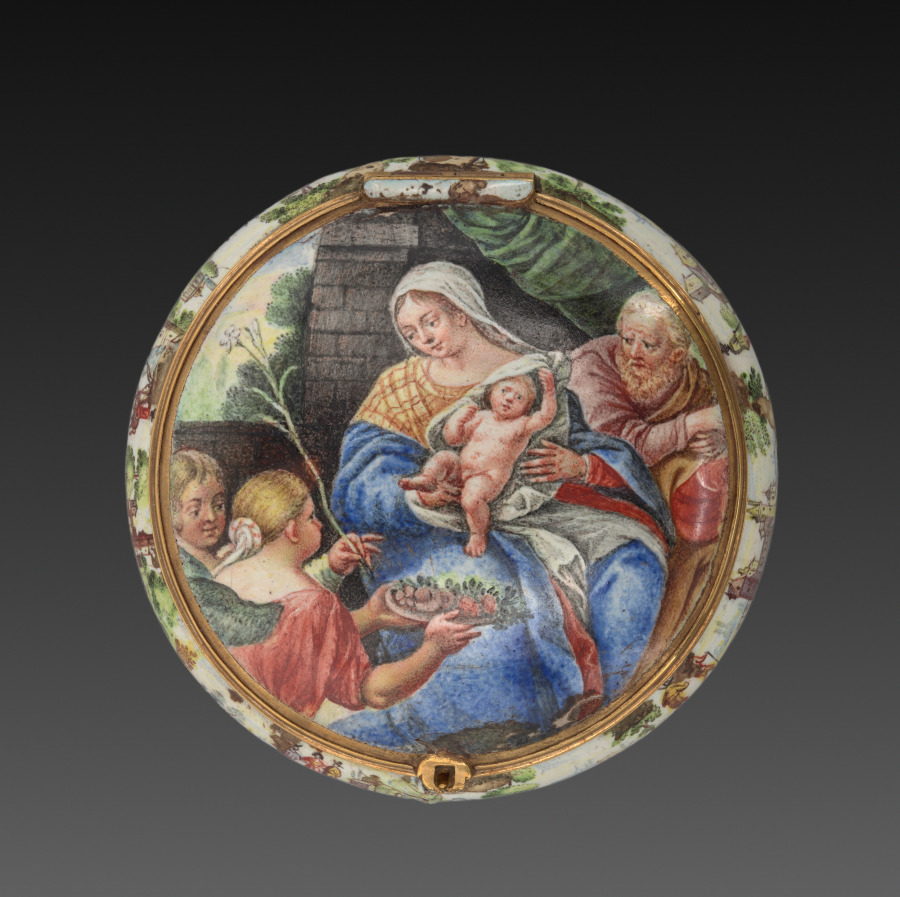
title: Watchcase (Boîtier de montre)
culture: France, 17th century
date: c. 1640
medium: gold and enamel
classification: Jewelry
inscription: [engraved on the rim]: "B8"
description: In the 1630s, the practice of painting with enamel on metal became a means for French miniature painters to achieve a more richly colored, durable product. Previously miniatures were painted with watercolor on vellum, a material made from animal skin. This case would have originally held a watch, but was later transformed into a simple box through the removal of the watch mechanism and ring. This watch case is richly painted inside and out with miniatures modeled after well-known religiously allegorical works.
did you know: Inspiration for the box’s miniatures was drawn from works by Peter Paul Rubens’ The Holy Family with Saints John the Baptist and Elizabeth (1615) (back panel) and Nicolas Cochin (interior base).